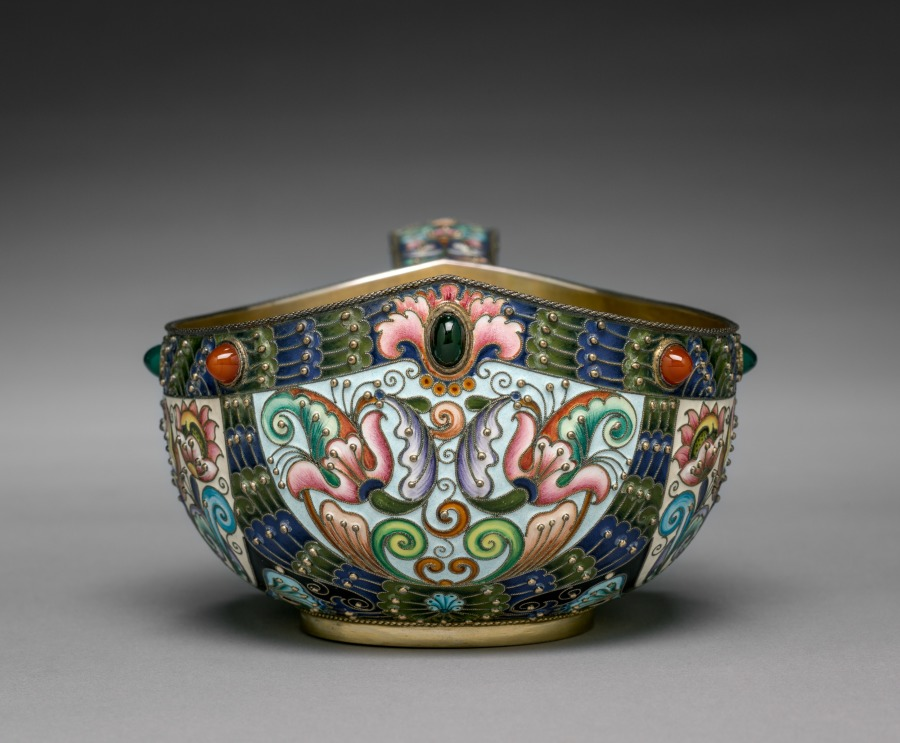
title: Kovsh (Wine Vessel)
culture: Russia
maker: House of Fabergé (Russian, 1842–1918)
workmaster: attributed to Feodor Ivanovich Rückert (Russian, 1840–1917)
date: 1896–1906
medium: silver gilt, enamel, cabochon gems, chrysoprases, carnelians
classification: Miscellaneous